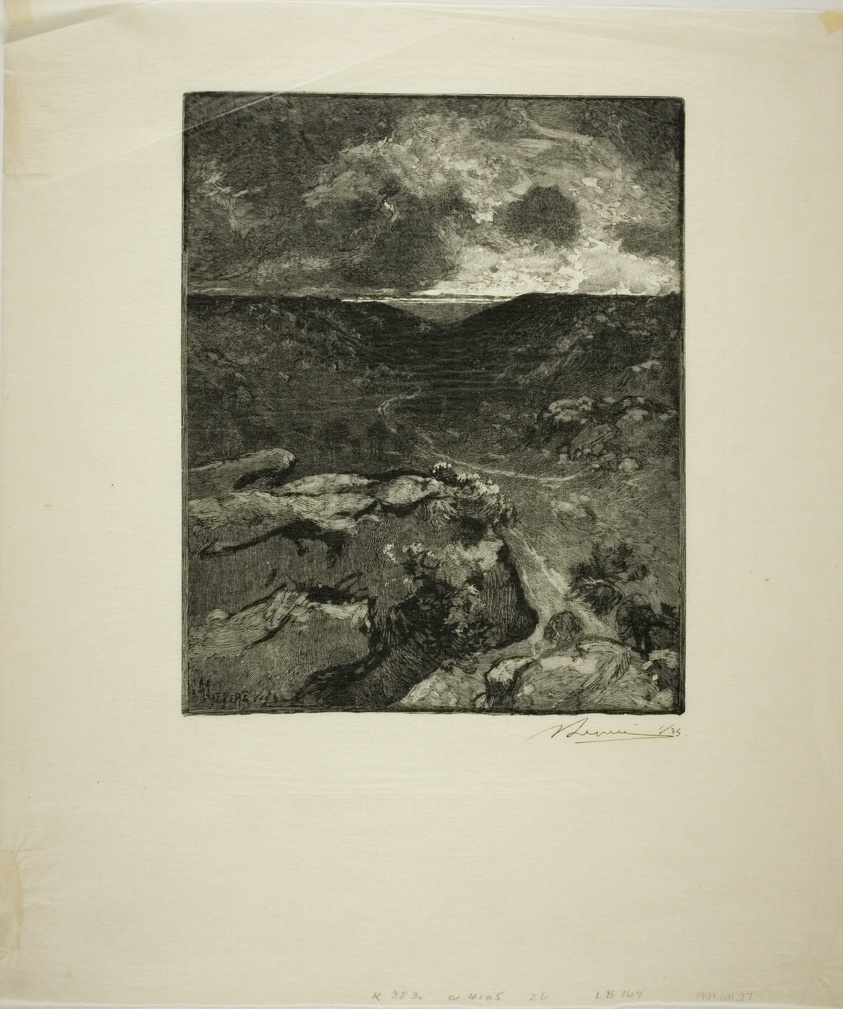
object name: Print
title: Franchard Valley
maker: Louis Auguste Lepère (French, 1849-1918); published by A. Desmoulins (French, active c. 1908-1910)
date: 1888, published 1908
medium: Wood engraving in black on cream laid Japanese paper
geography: France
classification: wood engraving; print; prints and drawing